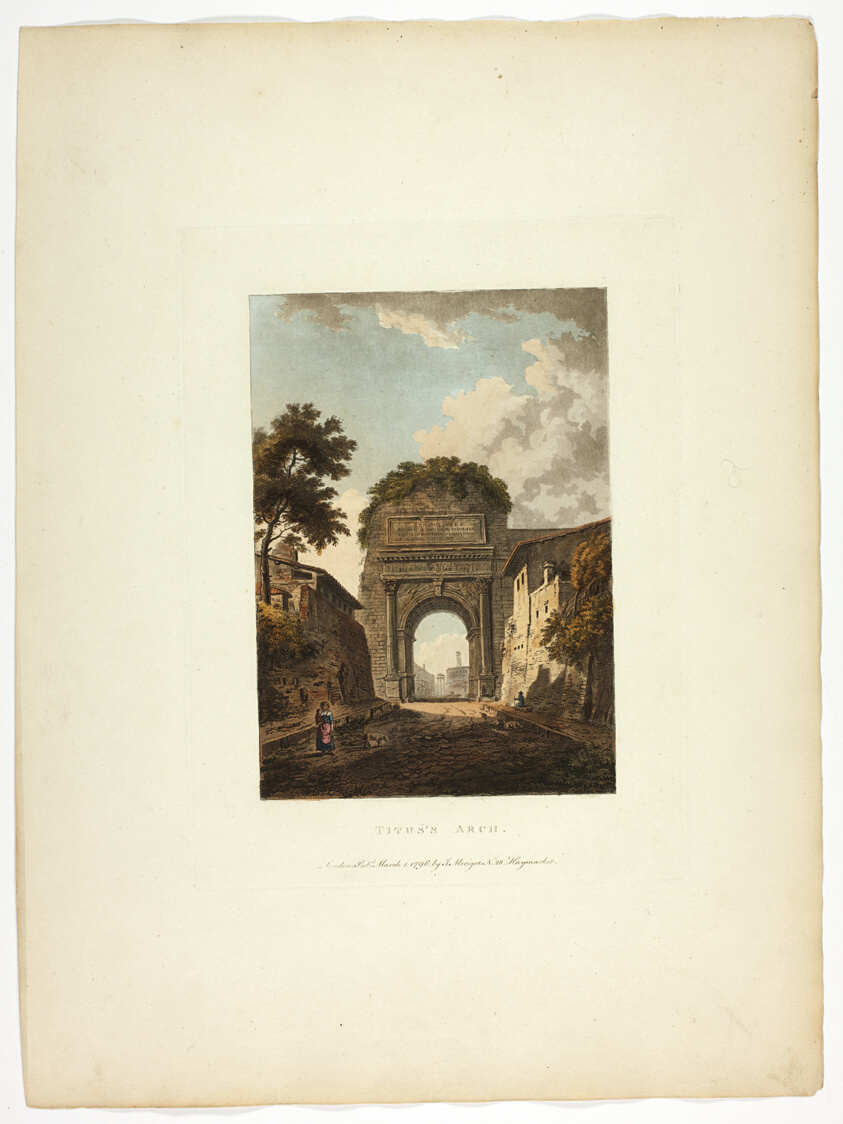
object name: Print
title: Titus's Arch, plate ten from the Ruins of Rome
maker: M. Dubourg, (English, active 1786-1838); published by J. Merigot (Italian, Unknown)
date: published March 1, 1796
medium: Hand-colored aquatint on paper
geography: England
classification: aquatint; print; prints and drawing